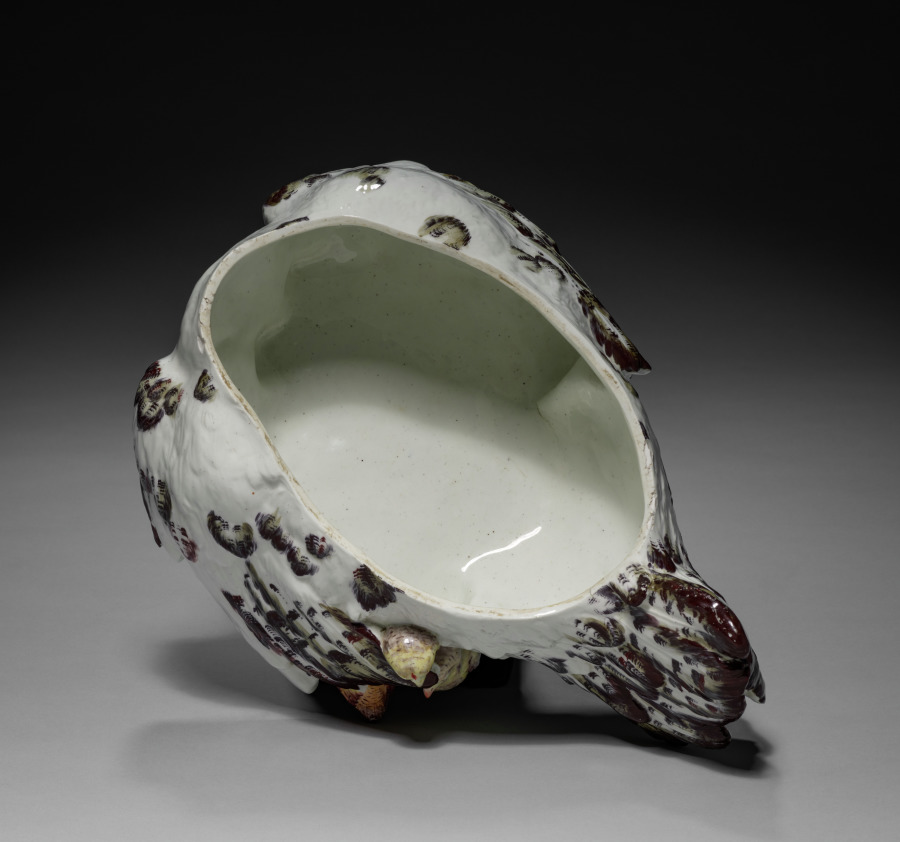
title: Hen and Chicks Tureen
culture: England, London, Chelsea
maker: Chelsea Porcelain Factory (Britain, London, 1745–84)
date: c. 1755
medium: porcelain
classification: Ceramic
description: The ceramic factory at Chelsea, located along the river Thames in western London, was Britain’s most renowned factory of decorative porcelain in the mid-1700s. Large tureens in the form of chickens or rabbits appealed to wealthy aristocrats, who took great care in developing specimen animal and poultry breeds on their country estates. The design for this particular tureen was taken from a popular seventeenth-century print by Francis Barlow depicting a farmyard.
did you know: See cover record.